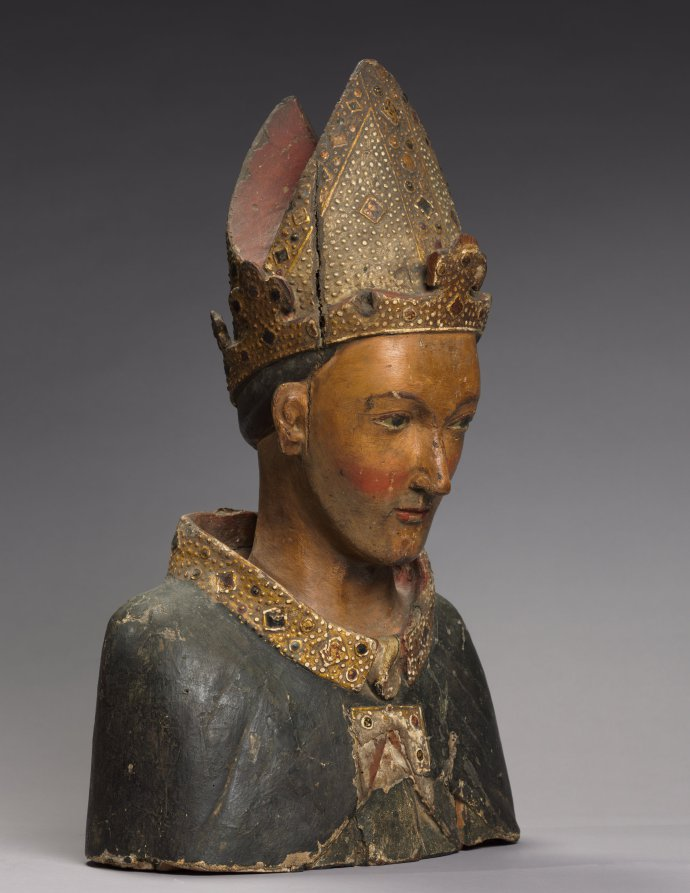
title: Bust Reliquary of St. Louis, Bishop of Toulouse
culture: Italy, Tuscany, Siena(?)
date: late 1300s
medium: wood (walnut) with polychromy, gesso and gilding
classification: Sculpture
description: This reliquary bust was probably made to house a relic of Saint Louis, Bishop of Toulouse (1274–97), second son of Charles II of Anjou, King of Naples (1288–1309). Renowned for his works of charity, he was made bishop in 1297 and died shortly after at the age of 23. He was canonized in 1317, and his cult of veneration spread rapidly in Italy and Spain. In art, Louis is generally represented as a "boy" bishop without a beard and with youthful features. The relic (now lost) would have been enshrined within. On feast days the reliquary would have likely been carried in procession and otherwise placed in a church sanctuary or on a side altar for the veneration of the faithful. Relics were the physical remains of the saints, chiefly their bodies. The living venerated the relics of the saints in order to seek their patronage, which in turn provided a proximate link to the divine ruler. The power of the saints was therefore manifested by and through their relics, or objects that were owned or touched by them. Medieval pilgrims, in a world fraught with peril, sought close physical contact with relics, which protected both the spiritual and temporal welfare of laypeople and religious communities.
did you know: This small bust was hewn out of wood, but painted realistically. Its life-like accuracy gave the medieval worshipper the sense that they were in the presence of the beloved bishop Saint Toulouse.